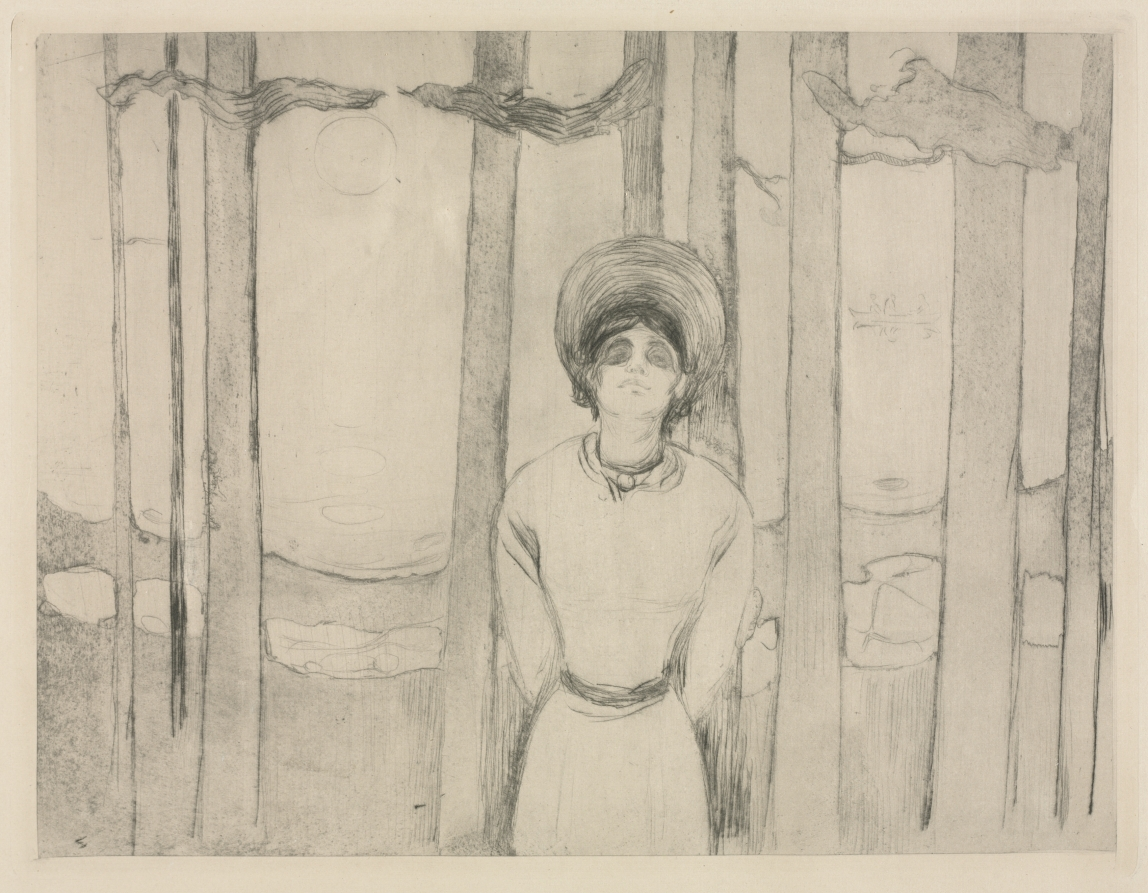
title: Summer Night (The Voice)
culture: Norway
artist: Edvard Munch (Norwegian, 1863–1944)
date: 1895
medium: etching and plate roughened with sandpaper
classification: Print